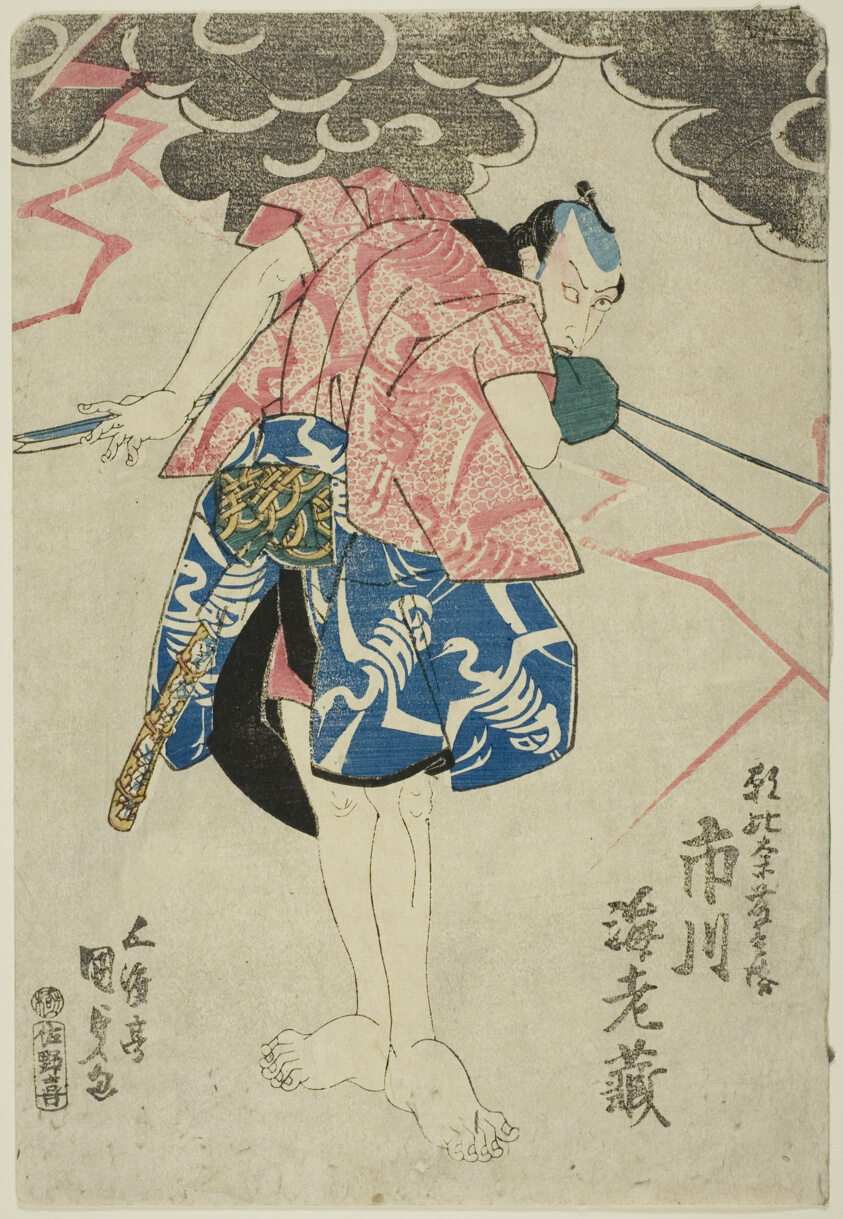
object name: Print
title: The actor Ichikawa Ebizo V as Asahina Tobei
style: Japanese (culture or style)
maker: Utagawa Kunisada I (Toyokuni III) (Japanese, 1786-1864)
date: c. 1841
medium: Color woodblock print; oban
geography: Japan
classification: woodblock print; print; asian art